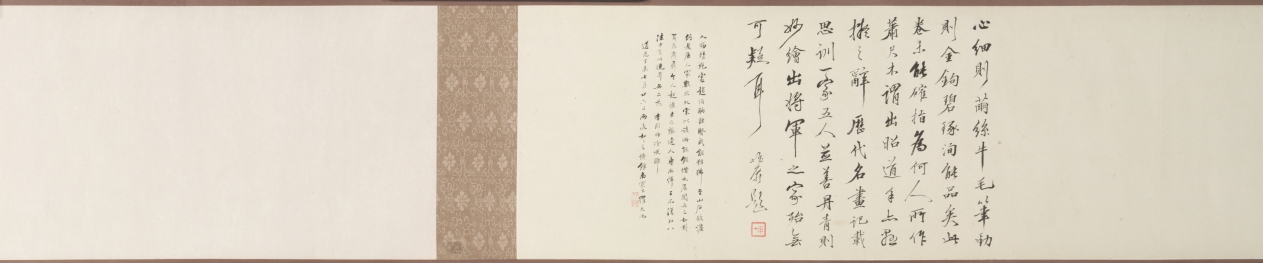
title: Waiting for the Moon in the Mid Autumn Festival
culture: China, Ming dynasty (1368–1644)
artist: Shi Rui (Chinese, c. 1400-c. 1470)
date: 1400s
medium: handscroll, ink, color, and gold on silk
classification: Painting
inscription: [印] 石氏以明; 游戯翰墨.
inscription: 僊山樓觀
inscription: 1 inscription, dated 1639, and 1 seal of Xiao Yuncong 蕭雲従 (1596-1673). Inscription by Xiao Yuncong: This is a painting by the Junior General Li. The painting is damaged and cracked at many places. Many of the paper strips for backing have been missing since long ago, but the colors are still fresh as if they had just been applied and the ink still looks moist. During the reign of Tianbao (742-756) of the Tang Dynasty, the Imperial Klansman Li Sixun was summoned to paint the walls of the Datong Hall. He was known as the "Senior General." His son, who came to be known as the "Junior General," was named Zhaodao. Of the stone epitaph [Li Sixun bei, or the "epitaph of Li Sixun," one of the best known calligraphic monuments of the Tang Dynasty], engraved with the calligraphy of Li Beihai 李北海 [Li Yong 李邕, 678-747], more than half has fallen off. Why, in contrast, was this painting able to survive? Or could it be that despite the fact that the stone is hard and the silk is soft, their preservation or destruction depends on some other factors? Moreover, since they were titled nobility of imperial descent, it is doubtful that they had the leisure and the mood to indulge in such decorative and descriptive blue and gold painting for the mere amusement of their fellow men. Recently, I read the Yi zhou ming hua lu 益州名畫錄 [by Huang Xiufu 黃休復, preface 1005]. I found a certain Li Chin-nu who compared himself with Li Zhaodao 李昭道 and was called by the Sichuan people the Junior General Li. In a painting which he did, entitled Mt. Ch'ing-ch'eng, the architectural structure of the pavilions, terraces, bridges, and boats are meticulous and accurate. The horsemen on a spring outing are as small as grain and the wild geese among the clouds as tiny as dust. It was also said that he painted on silk of any length in accordance to specific commissions. Is it possible that this painting is one of his? Since that time 700 years have passed. Yet one of the two Junior General Li's must be our painter. Formerly, there were the so-called "Four Excellents" in the Hall of Portraits of the Buddhist monk Wu-ta Kuo-shih: the [portrait] painting by Ch'ang Ts'an [act. ca. 881-888}, the calligraphy by Priest Tao-ying, the eulogy by Li Shangyin 李商隱 [813-858], and the landscape by Li Sheng [act. ca. 908-925]. This Li Sheng was styled Chin-nu and was also called Junior General Li. In the tenth month of the Chi-mao year, the twelfth year of the Chongzhen era [1639], recorded by Xiao Yuncong of Wuhu. trans. WKH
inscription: 4 colophons and 30 additional seals: 1 seal of Xu Qianxue 徐乾學 (1631-1694); 1 seal of Li Chien 黎簡 (1747-1799); 1 seal of Chang Chin-fang (18th c.); 2 seals of Sun Erzhun 孫爾準 (1770–1832); 1 colophon and 2 seals of Zhang Weiping 張維屛 (1780-1859); 1 seal of Wu Rongguang 吳榮光 (1773-1843); 1 colophon and 2 seals of Luo Tianchi 羅天池 (1826 jinshi); 7 seals of Wu Yanhui 伍元蕙 (active 1821–1851); 2 colophons and 4 seals of Pan Zhengwei 潘正煒 (1791-1850); 9 seals unidentified.